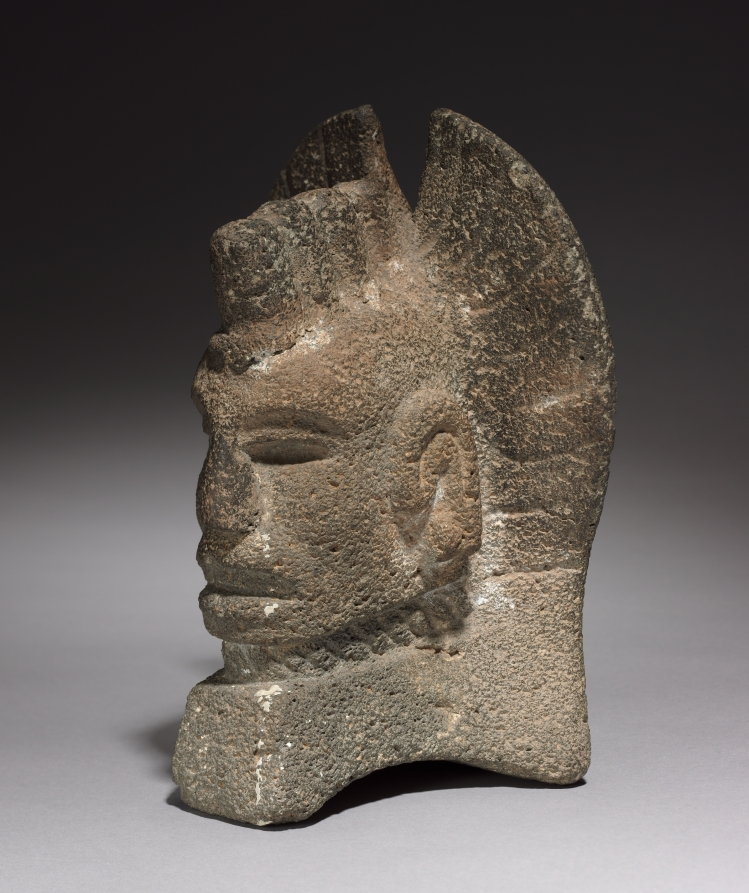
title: Head Palma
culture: Mexico, Veracruz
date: 600–1000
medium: gray volcanic stone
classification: Sculpture